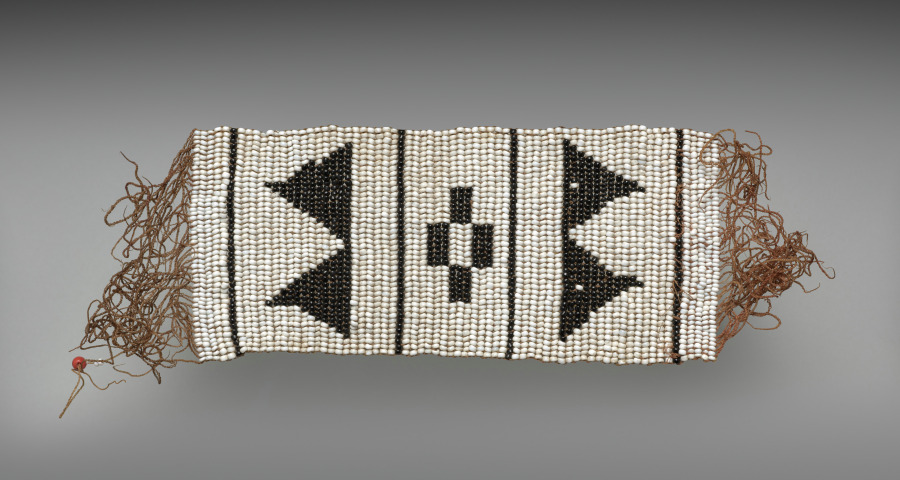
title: Royal ceremonial beadwork: anklet (izitsaba)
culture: Africa, Southern Africa, South Africa, Southeast Cape Region, Unknown female Xhosa-style maker(s)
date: 1800s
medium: Glass beads and sinew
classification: Mixed Media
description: Elite Xhosa women once wore beaded garments like this on festive occasions. Made almost completely from imported Venetian or Bohemian glass beads, they were overt status symbols. Imported beads functioned as money for the Xhosa between about 1770 and 1829. These garments’ female maker carefully selected beads of the highest quality, uniform in color, shape, and size. Made in the same shape as the pendant, a swallowtail-shaped apron (CMA 2010.206) worn under the skirt completed the ensemble.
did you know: The beads to make an ensemble like this cost several cattle in the early 1800s, an amount most couldn't afford.